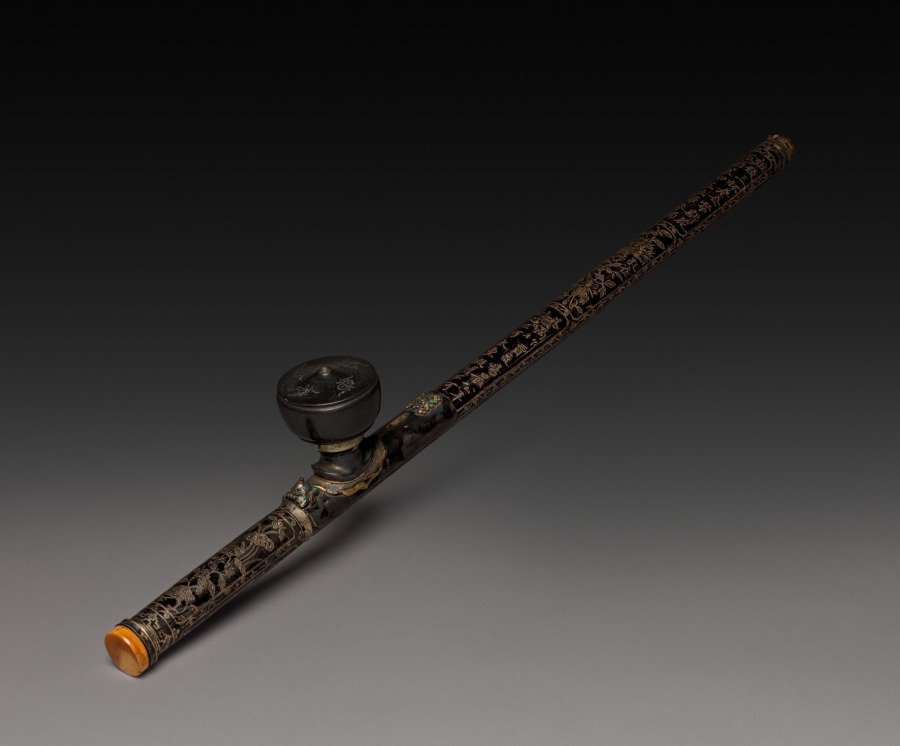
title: Opium Pipe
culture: China, Qing dynasty (1644-1911)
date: 1800s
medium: lacquer, ivory, jade and silver inlay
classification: Miscellaneous